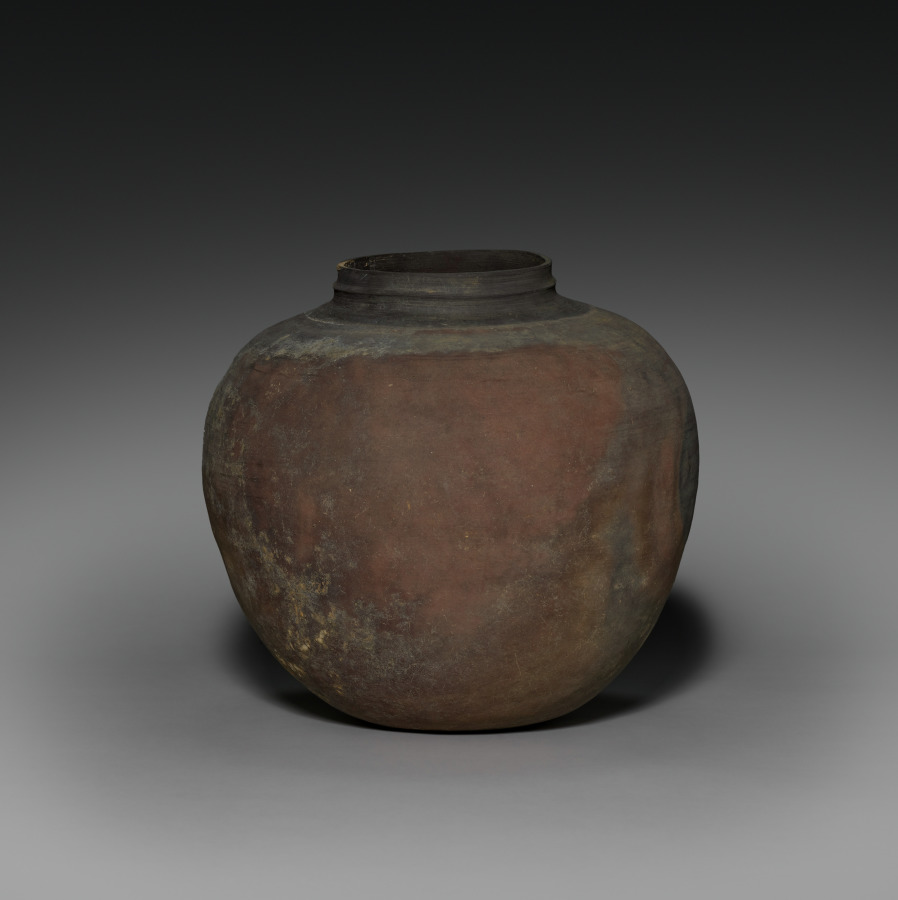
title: Vessel with Knobbed Lid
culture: Korea, Gaya period (42–562 CE)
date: 200s–300s CE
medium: stoneware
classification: Ceramic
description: This storage vessel is distinguished by its robust, subtly proportioned form and its body color. The purplish-brown surface "skin" is enlivened by a series of smoky black swirling marks that occurred during the firing in the wood kiln. This shape began as a series of clay coils that were pinched and then paddled; however, it spent more time on a potter's wheel to thin and finish its outer surface. The lid received similar, understated attention to detailing and finish.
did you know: This type of lidded vessel served to contain cremated remains, indicating the popularity of Buddhist mortuary practice in Korea during the Three Kingdoms period.